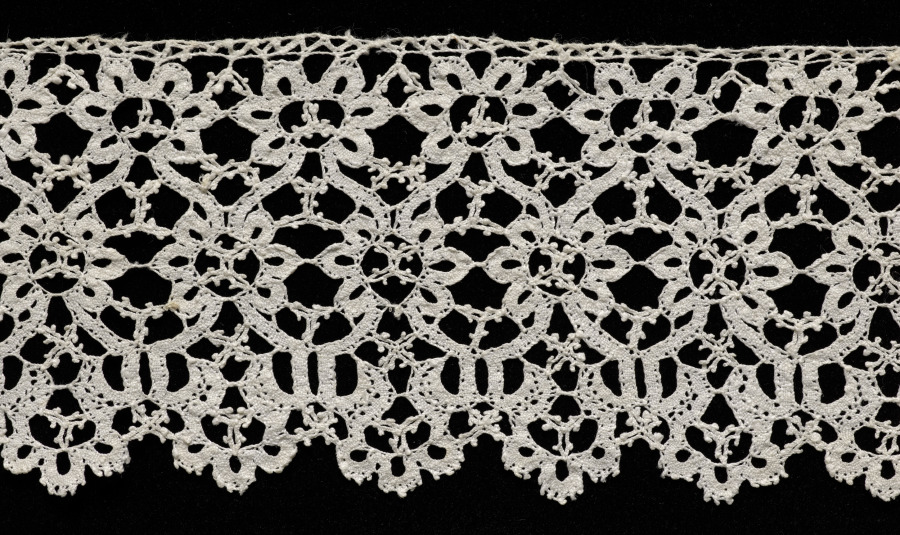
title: Lace Edging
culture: Italy, Genoa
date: 1600s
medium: Linen: bobbin lace (tape lace design)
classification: Lace